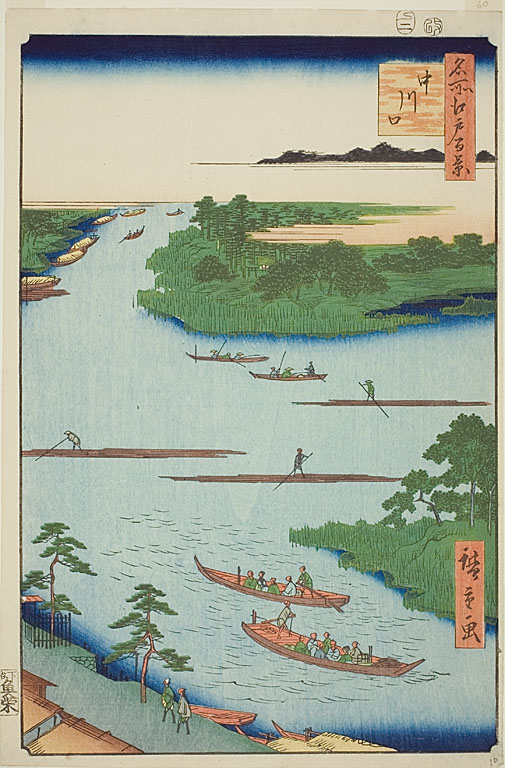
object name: Print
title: Mouth of the Nakawaga River (Nakagawaguchi), No.70 from the series “One Hundred Famous Views of Edo (Meisho Edo hyakkei)”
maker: Utagawa Hiroshige (Japanese, 1797-1858)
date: 1857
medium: Color woodblock print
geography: Japan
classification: woodblock print; print; asian art